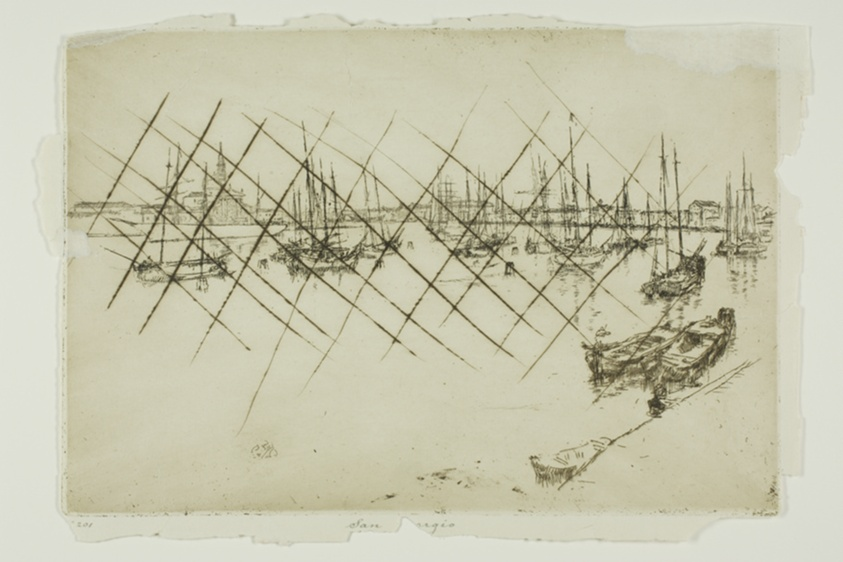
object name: Print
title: San Giorgio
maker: James McNeill Whistler (American, 1834-1903)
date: 1879/80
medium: Etching and drypoint with foul biting, with drypoint cancellation, in dark brown ink on ivory laid paper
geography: United States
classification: etching; print; prints and drawing; drypoint; foul biting; paper